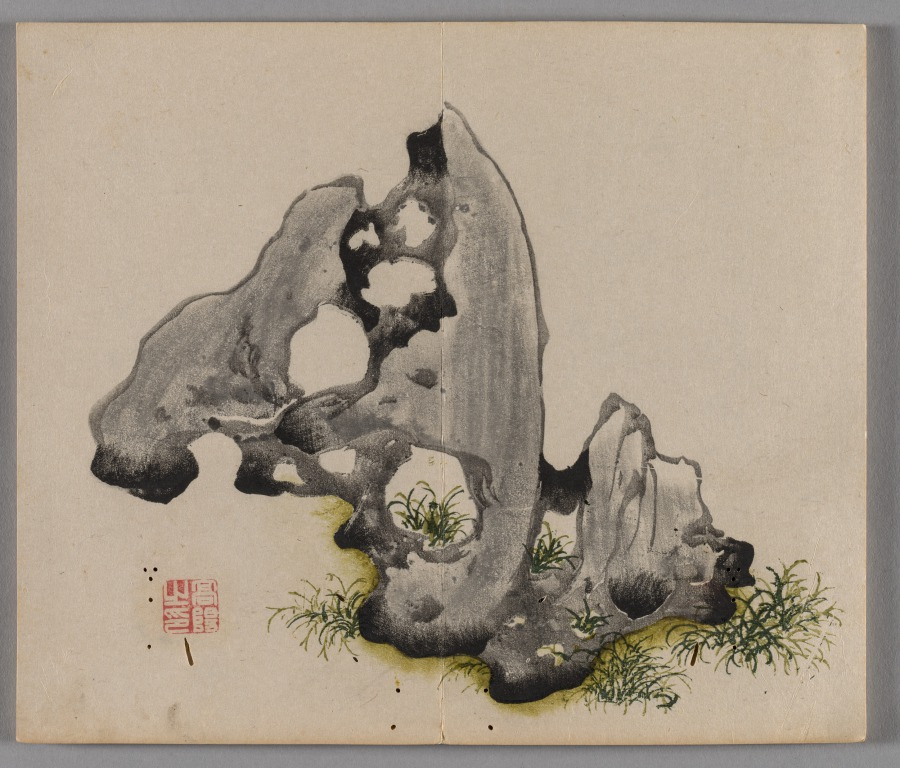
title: Ten Bamboo Studio Painting and Calligraphy Handbook (Shizhuzhai shuhua pu): Rocks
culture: China, Qing dynasty (1644-1911)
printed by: Hu Zhengyan (Chinese, c. 1584–1674)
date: 1633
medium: Woodblock-printed book; ink and colors on paper; first edition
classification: Print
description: Color printing reached a level of perfection in the early 1600s, as seen in this Ten Bamboo Studio Collection of Calligraphy and Painting and the Mustard Seed Garden Manual of Painting (printed 1679 and 1701). The painterly quality, precision in registering (aligning) the woodblocks, and harmonious colors made them the most successful color print editions in Chinese history. Both editions were printed and compiled in Nanjing, spread nationwide, and had a great impact on the arts in Japan and Korea.